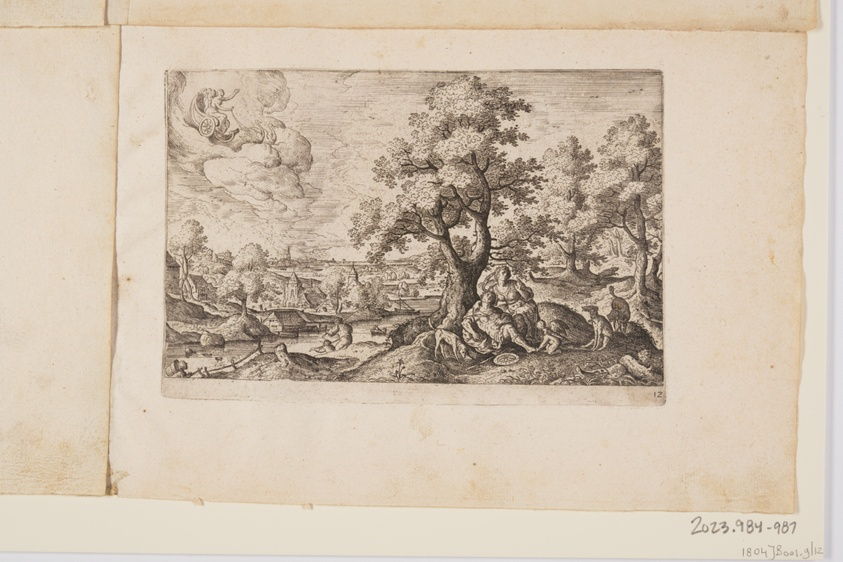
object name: Print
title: Plate 12, from Landscapes with Scenes from the Old and New Testament and Ovid’s Metamorphoses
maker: Hans Bol (Flemish, 1534–1593); published by Philip Galle (Flemish, 1537–1612)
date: 1574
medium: Etching on ivory laid paper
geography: Flanders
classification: print; paper; prints and drawing; etching